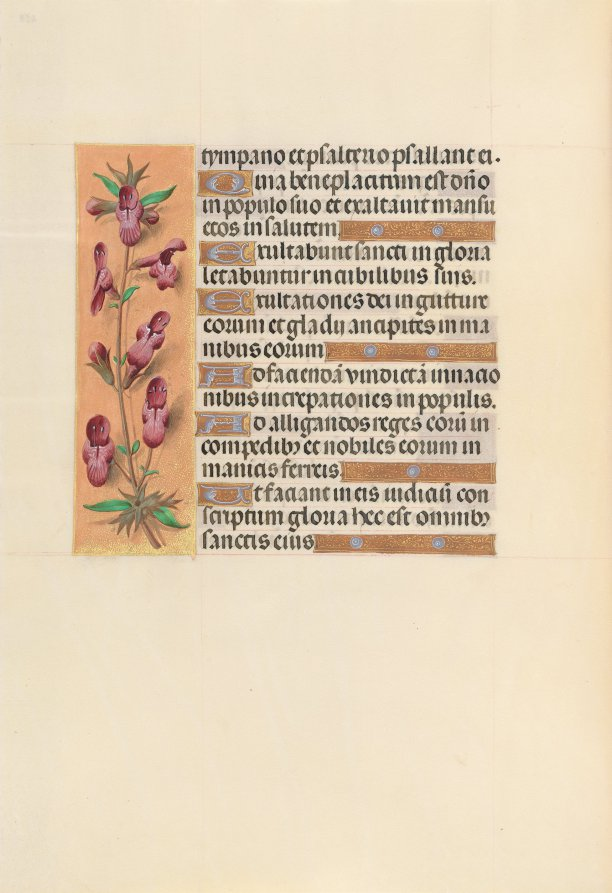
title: Hours of Queen Isabella the Catholic, Queen of Spain: Fol. 253v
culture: Flanders, Ghent and Bruges, late 15th century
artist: Master of the First Prayerbook of Maximillian (Flemish, c. 1444–1519)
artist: and Associates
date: c. 1500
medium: ink, tempera, and gold on vellum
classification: Bound Volume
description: This manuscript was illuminated by a circle of at least five highly organized manuscript painters active in the Flemish cities of Ghent and Bruges. The principal illuminator was Alexander Bening, who painted the majority of the book's miniatures. Manuscripts produced by this circle of artists are renowned for the decoration of their borders, which typically feature a rich variety of realistically-painted flowers, birds, and butterflies. This prayer book, called a book of hours, was intended not for a cleric, but for the private devotions of a lay person-in this case, Isabella the Catholic, Queen of Spain (1451-1504). Isabella's coat of arms embellishes the book's frontispiece. It is unlikely that the book was commissioned by the Queen herself; rather, she probably received it as a diplomatic gift from someone courting her patronage, perhaps Cardinal Francisco Jimenez de Cisneros. A Franciscan friar, Jimenez was dependent upon Isabella for his advancement, first to the post of Queen's confessor in 1492, and then to Archbishop of Toledo in 1495.